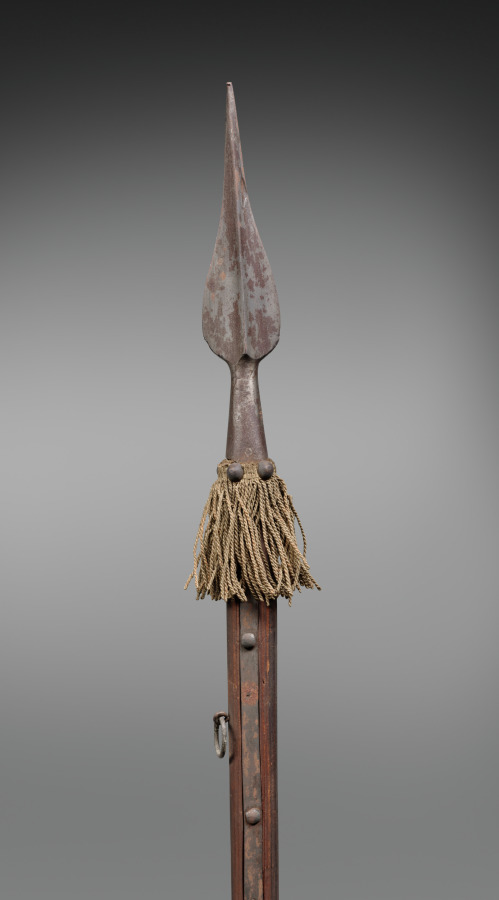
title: Banner with Medallions of Christ's Passion (pole)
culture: Spain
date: 1700s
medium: wood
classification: Arms and Armor